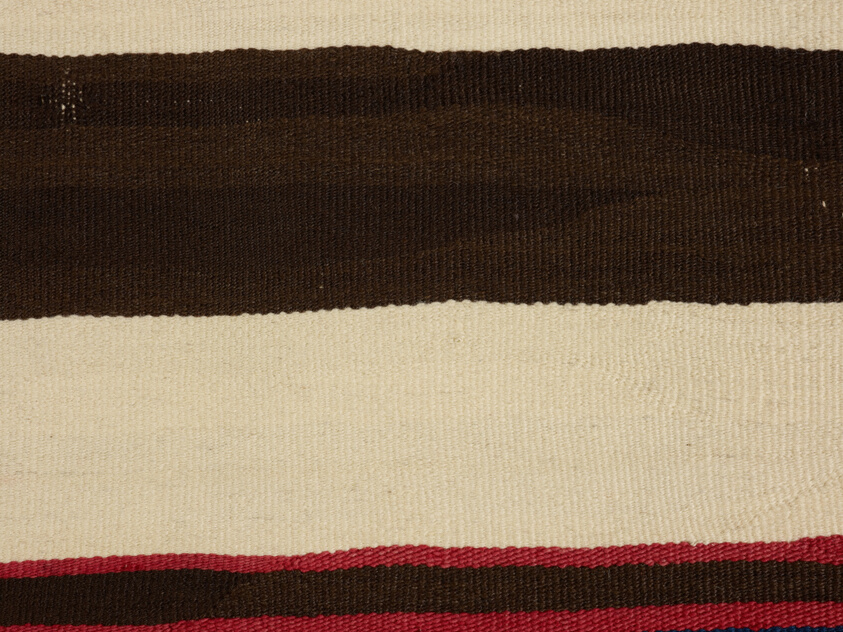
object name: Costume and Accessories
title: Wearing Blanket (Phase II)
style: navajo, americas, dine, 19th century, Arts of the Americas, indigenous, southwest, native american, north american, native north american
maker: Navajo (Diné) (Arizona, New Mexico, and Utah, United States)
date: 1850-65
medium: Wool; single interlocking tapestry weave; twined edges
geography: Navajo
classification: textile; blanket (covering); costume; garment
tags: geometric, arrow, squares, stripes